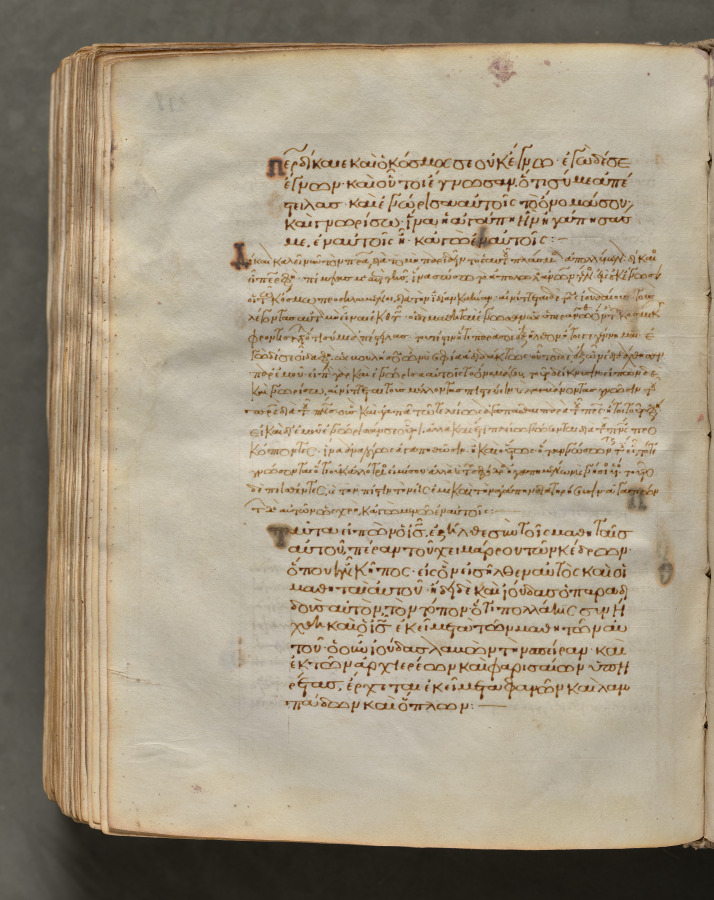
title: Text, folio 406 (verso), from a Gospel Book with Commentaries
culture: Byzantium, Constantinople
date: c. 1000–1100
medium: ink, tempera, and gold on vellum; leather binding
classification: Bound Volume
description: Each of the four gospels in this book opens on a page with brilliantly illuminated borders depicting the author of the text as well as birds—principally peacocks, symbols of the immortality of the soul—and fountains, representing the fountain of life and the salvation of the soul. This volume consists of 428 leaves with texts in Greek. Its level of sophistication suggests that it was probably written and decorated in a monastery in Constantinople.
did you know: Gospel books were carried in procession through Byzantine churches.